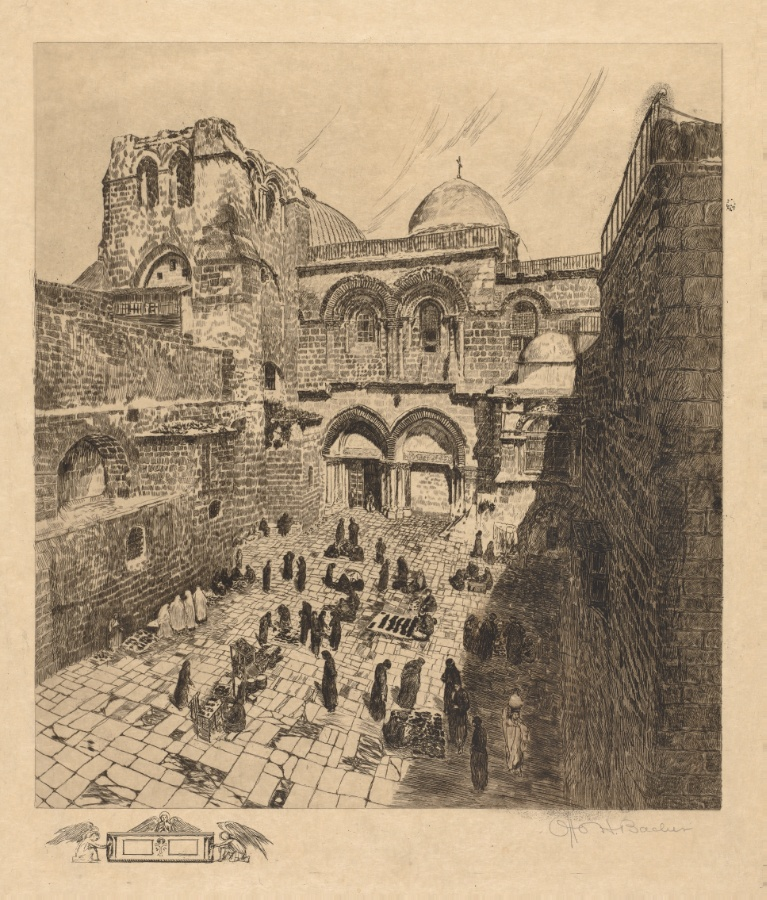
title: Grand Canal, Venice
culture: America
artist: Otto H. Bacher (American, 1856–1909)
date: 1888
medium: etching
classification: Print